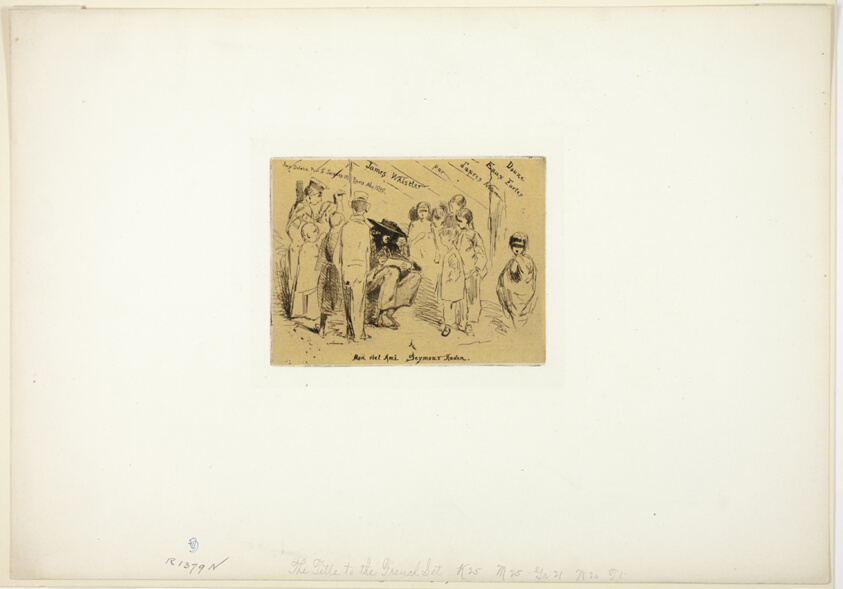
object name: Print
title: The Title Page for 'Douze Eaux Fortes d'après Nature'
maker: James McNeill Whistler (American, 1834-1903)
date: 1858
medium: Etching with foul biting in black ink on tan China paper laid down on ivory wove paper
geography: United States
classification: etching; foul biting; print; prints and drawing; paper